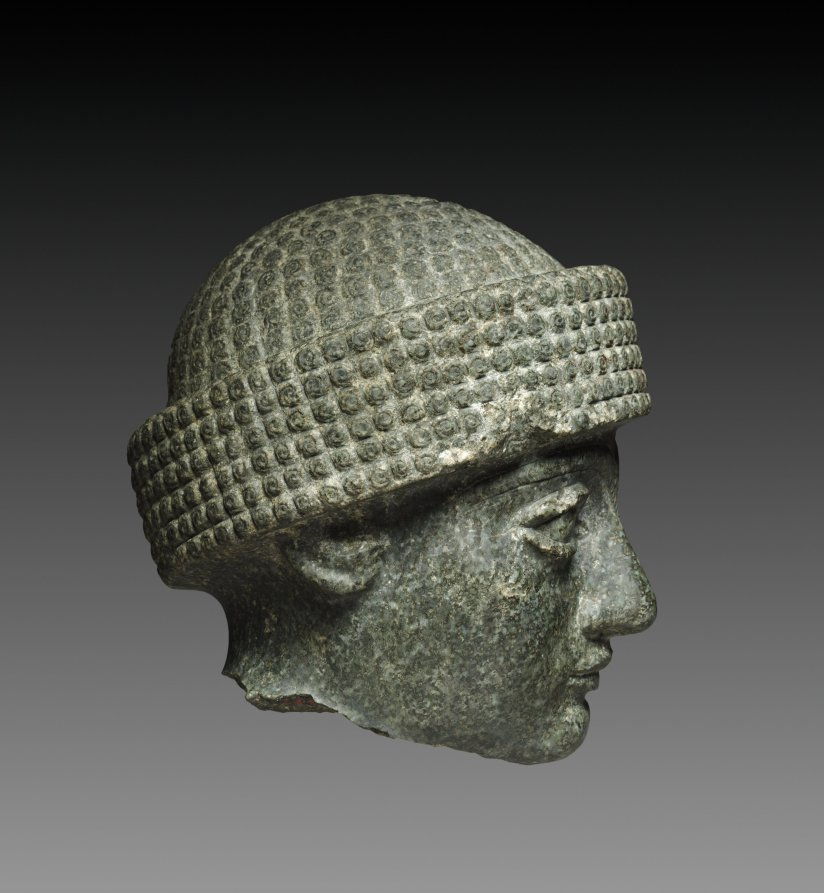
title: Head of Gudea, ensi of Lagash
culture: Mesopotamia, Iraq, Lagash (Tello)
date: 2144–2124 BCE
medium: dolerite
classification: Sculpture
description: Gudea was an ensi or ruler of the southern Mesopotamian city-state of Lagash in the 22nd century BCE. Archaeologists have found over 30 complete and fragmentary statues of his likeness and over 2,400 inscriptions mentioning his name. Gudea was both a political and religious leader, and most of the statues depicting him were housed in temples.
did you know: This head was originally on the body of 1963.154; however, they were separated in 1974 when it was realized they did not belong together.